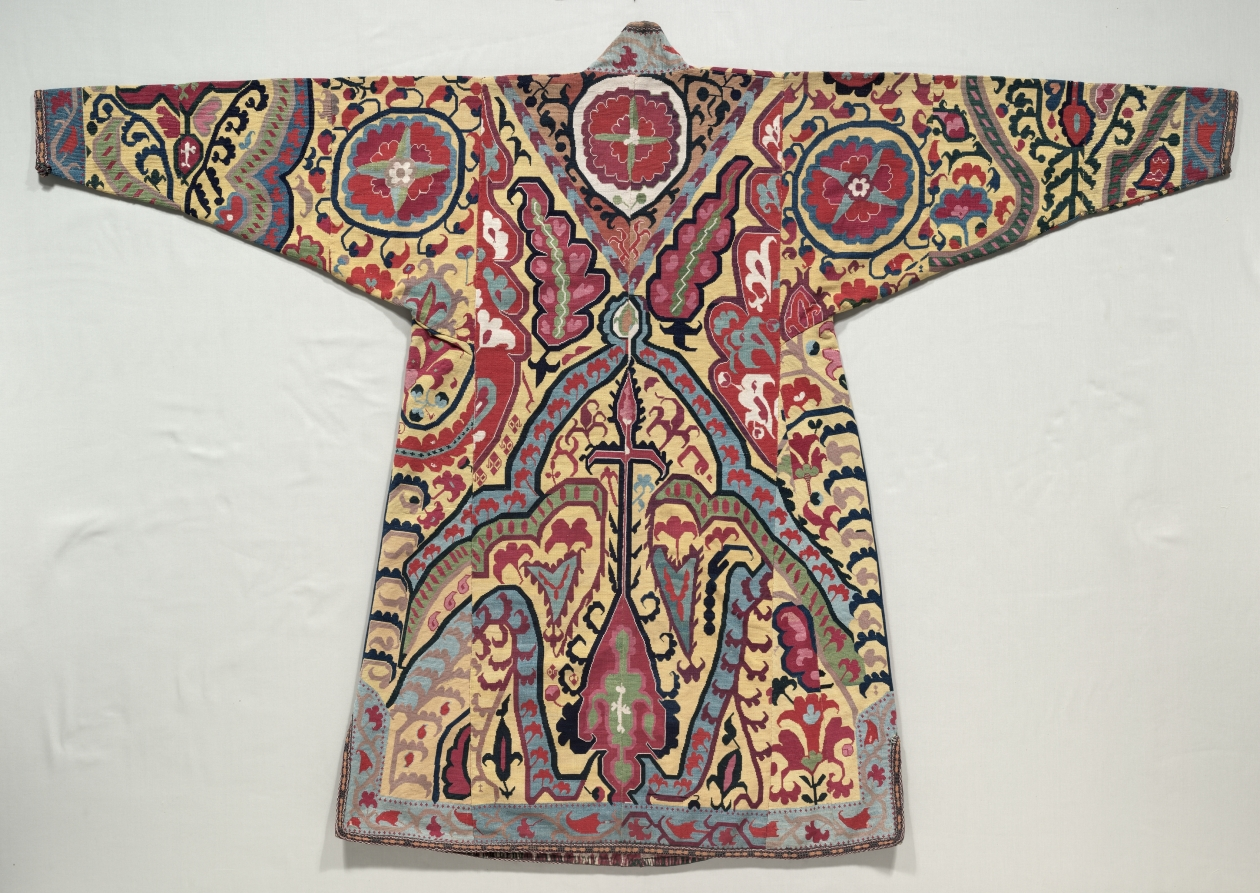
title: Man's surcoat (khalat)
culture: Uzbekistan, Shahr-i Sabz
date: late 1800s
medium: Silk: embroidery, cross-stitch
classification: Garment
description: Prestigious men’s surcoats embellished with designs such as this dramatic decoration in cross-stitch were among the most elaborate silk-thread embroidered garments in Central Asia. In a flamboyant style, large palmettes framed by split palmette leaves dominate with quartered rosettes and smaller flora on a brilliant yellow ground. Foliate vines enhance the edge along the front center opening, hemline, and cuffs. It is lined with an ikat of cypress trees and finger-looped trim. The style and technique represent professional work from Shahr-i Sabz, south of Samarkand. The pattern was drawn on the cotton ground cloth of the surcoat, then disassembled for stitching, and finally reassembled—revealed by severed and misaligned motifs plus mismatched colors.